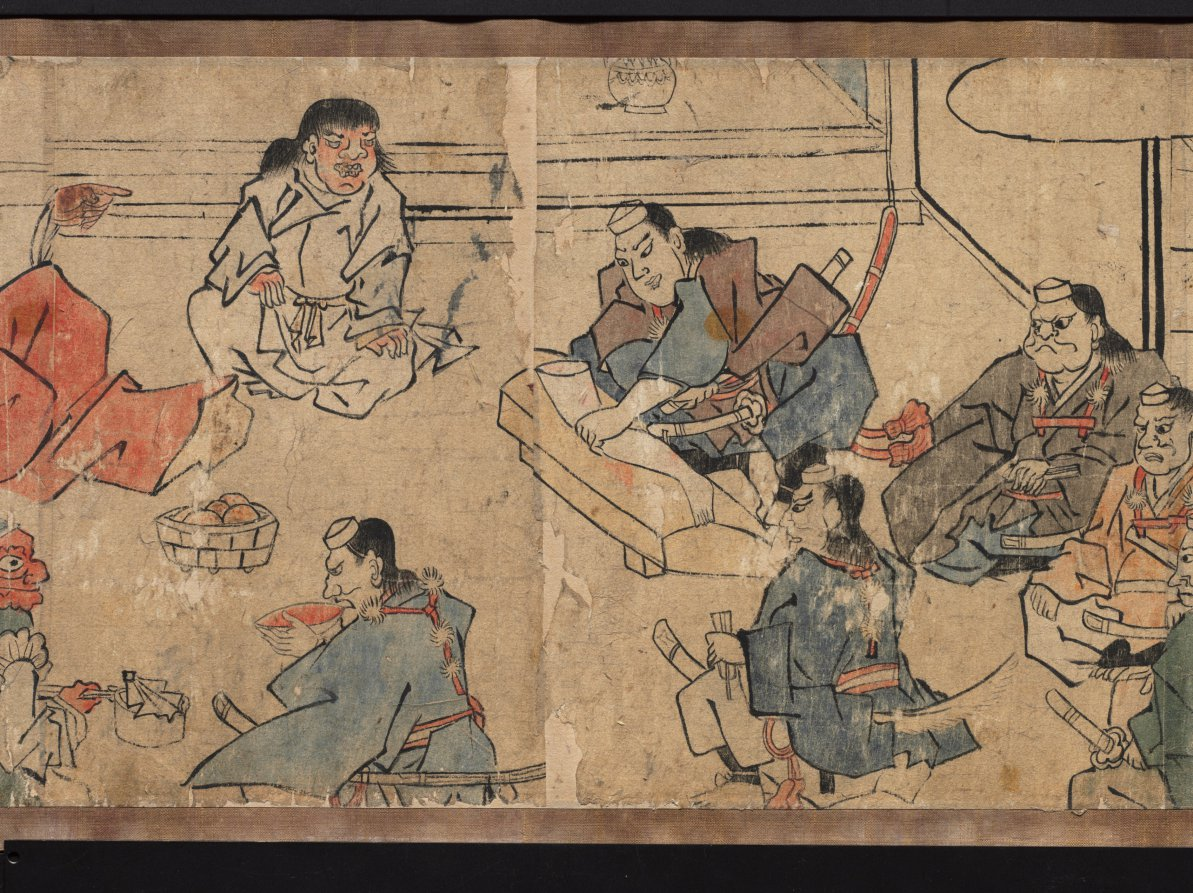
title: Oeyama Engi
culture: Japan, Edo period (1615–1868)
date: 1615–1868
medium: one of a pair of handscrolls; ink and color on paper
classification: Painting